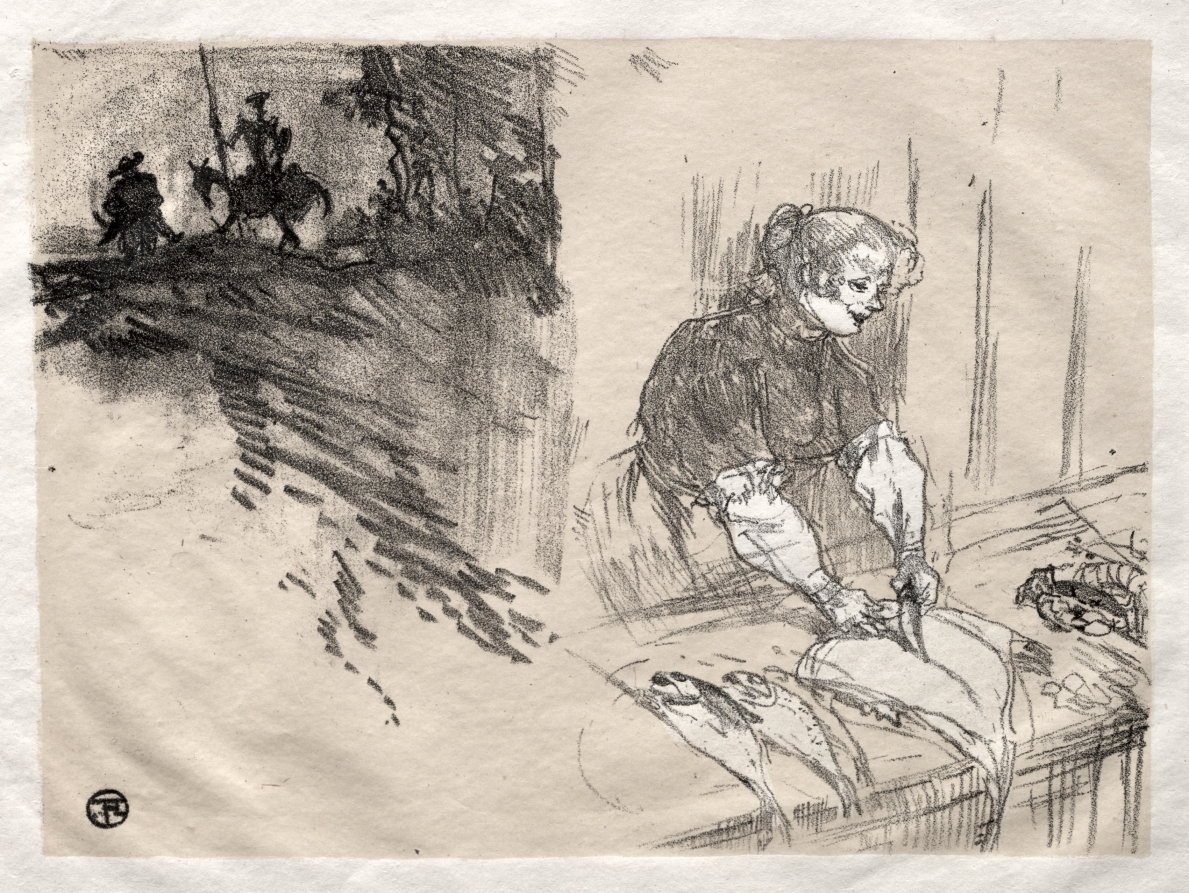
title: The Brief Joys: Cover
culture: France, 19th century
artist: Henri de Toulouse-Lautrec (French, 1864–1901)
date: 1897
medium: lithograph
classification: Print